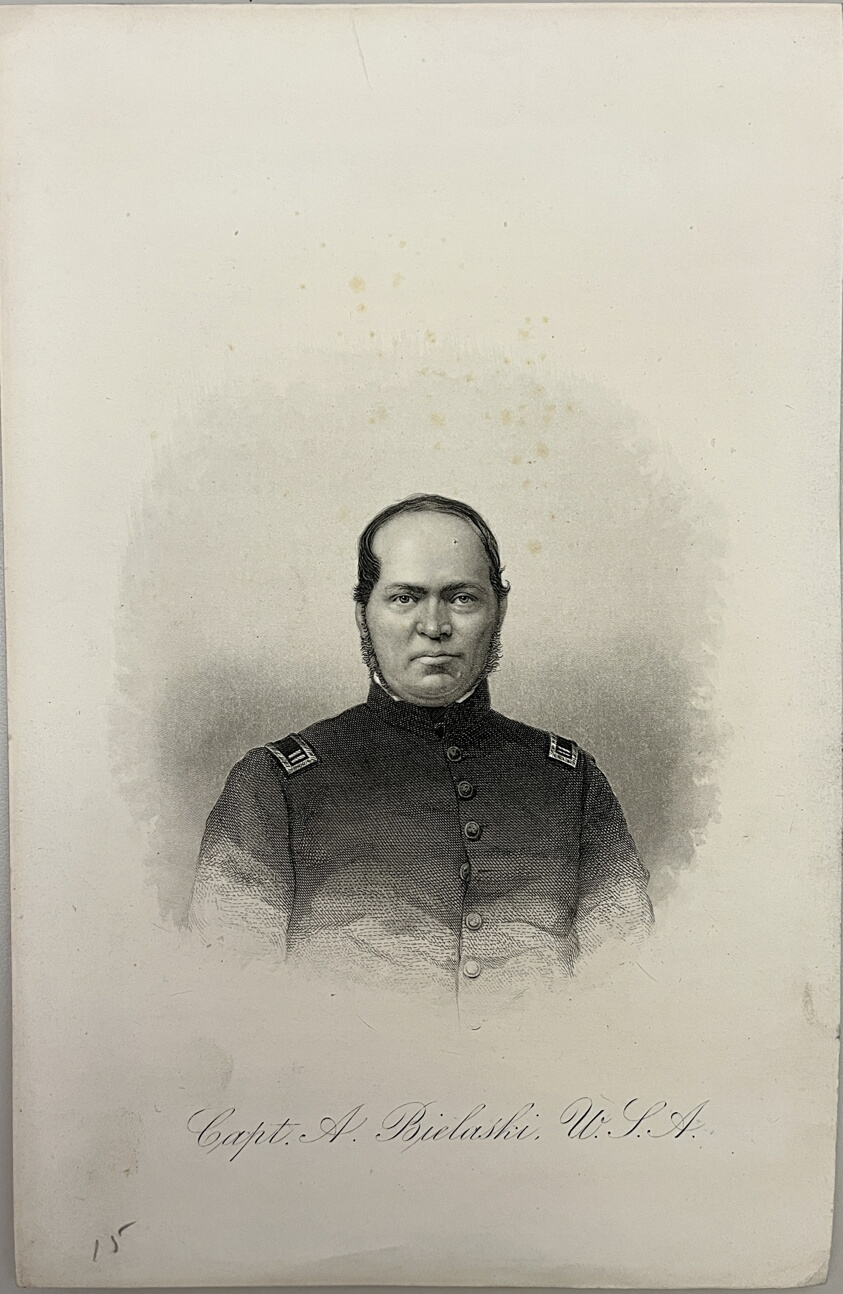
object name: Print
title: Captain Alexander Bielaski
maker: Artist Unknown (Likely American or British, 19th century)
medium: Stipple and line etching on paper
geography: United States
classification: reproduction; print; prints and drawing